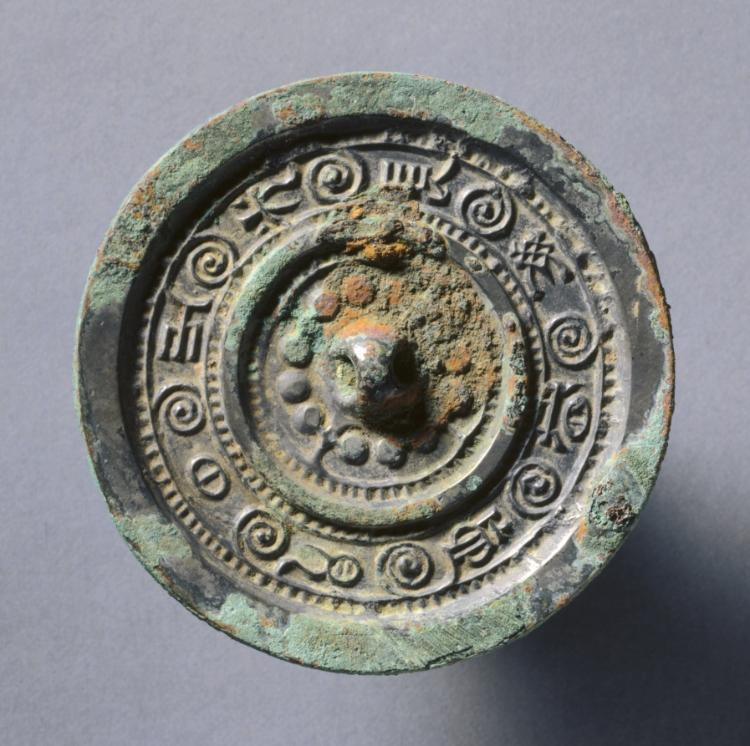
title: Mirror with Concentric Circles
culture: China, Western Han dynasty (206 BCE–8 CE)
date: late 300s BCE–50 CE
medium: bronze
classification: Metalwork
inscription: By the light of the sun, forget me not-ever.